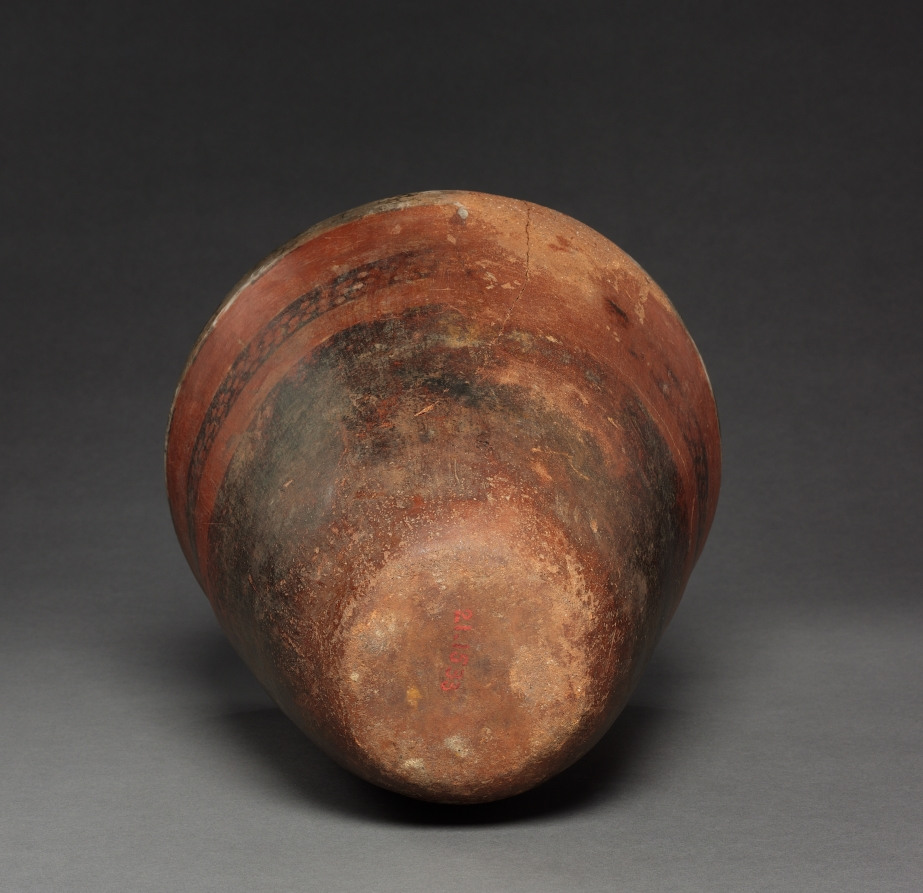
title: Vase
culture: Colombia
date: 1000–1550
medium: pottery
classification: Ceramic